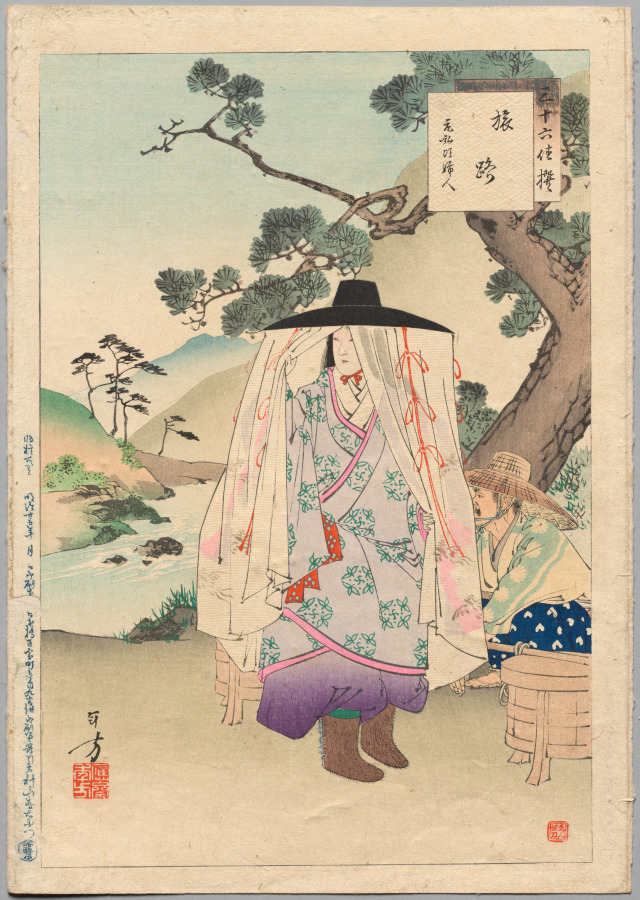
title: On the Road, A Lady of the Genkō Era (1313-34), from the series Thirty-Six Elegant Selections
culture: Japan, Meiji period (1868–1912)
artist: Mizuno Toshikata (Japanese, 1866–1908)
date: 1894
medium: Woodblock print, ink and color on paper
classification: Print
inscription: Inscription Type: series title Inscription Transliteration: 三十六佳撰 Inscription Romanization: Sanjūrokkasen Inscription translation: The Thirty-six Elegant Selections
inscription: Inscription Type: print title Inscription Transliteration: 旅路元頃婦人 Inscription Romanization: Tabiji Genkō koro fujin Inscription translation: On the Road, A Lady of the Genkō Era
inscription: Inscription Type: artist’s signature Inscription Transliteration: 年方 Inscription Romanization: Toshikata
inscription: Inscription Type: artist’s seal Inscription Transliteration: 應斎年方 Inscription Romanization: Ōsai Toshikata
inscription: Inscription Type: engraver’s seal Inscription Transliteration: えん活刀 Inscription Romanization: En-Katsu to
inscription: Inscription type: date and publisher’s information Inscription Translation: Meiji 27 (1894) Akiyama Buemon (summary)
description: Each of the prints in the series Thirty-six Elegant Selections features a woman from a different time period, as befits an artist who was interested in history painting. Most of the prints are set in the Edo period (1615–1868). Mizuno Toshikata was a favored student of Tsukioka Yoshitoshi (1839–1892), and took over his post as a newspaper illustrator.